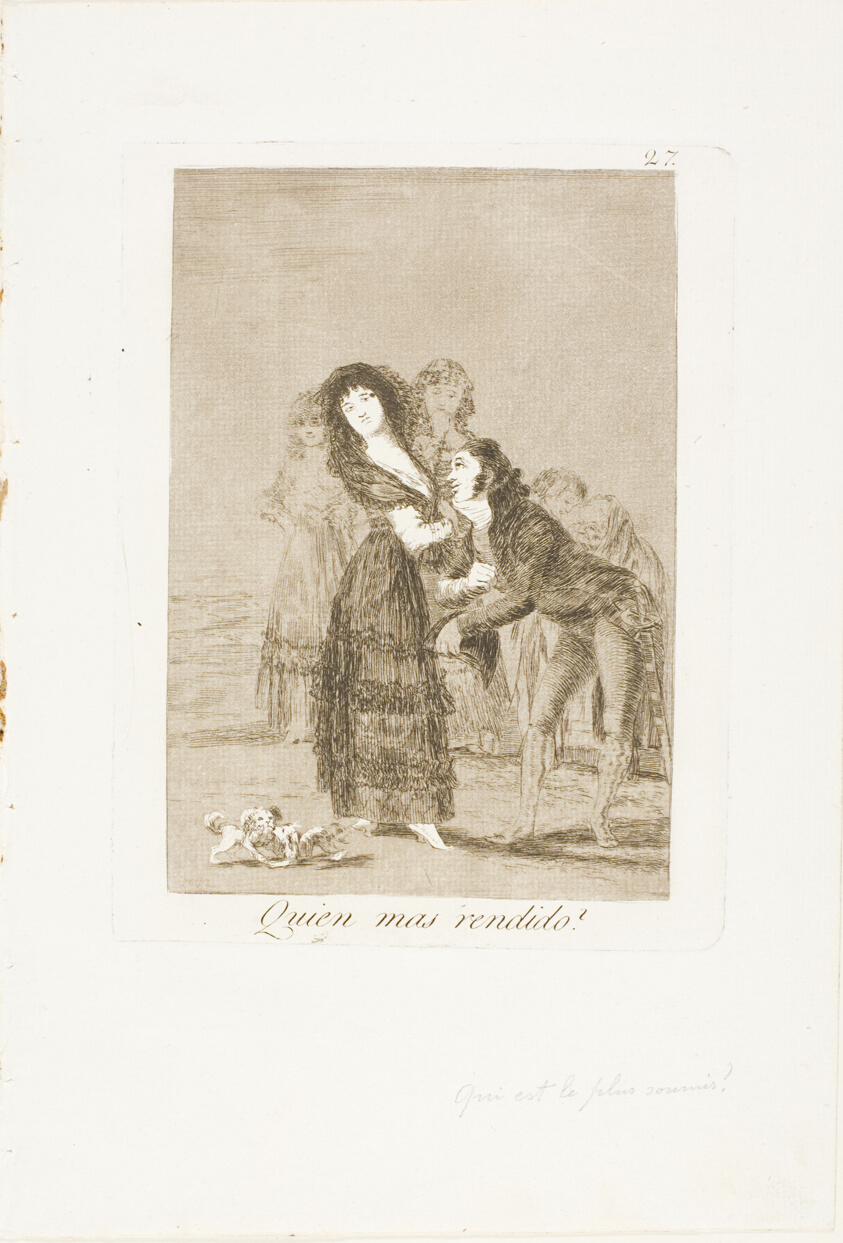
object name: Print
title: Which of Them is the More Overcome?, plate 27 from Los Caprichos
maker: Francisco José de Goya y Lucientes (Spanish, 1746-1828)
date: 1797/99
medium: Etching and aquatint on ivory laid paper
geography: Spain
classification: etching; print; prints and drawing